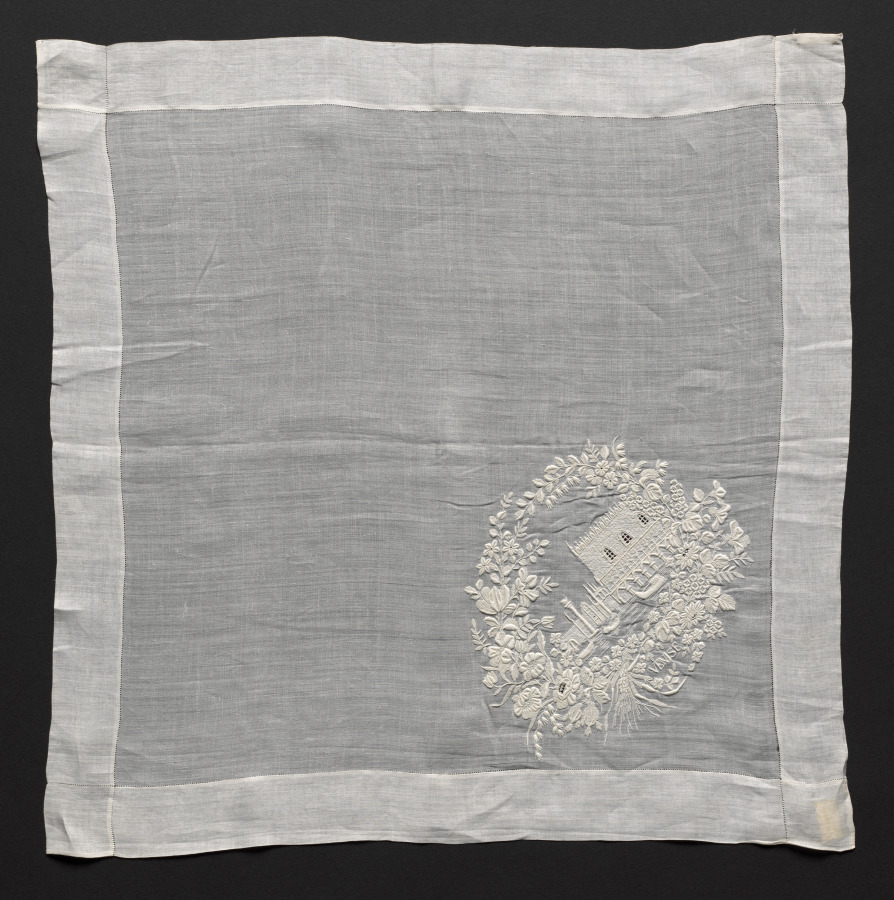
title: Embroidered Handkerchief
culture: Italy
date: 1800s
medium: Plain weave linen, embroidered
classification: Embroidery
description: A scene of the Doge's Palace, Venice, is embroidered in white in one corner of this handkerchief.